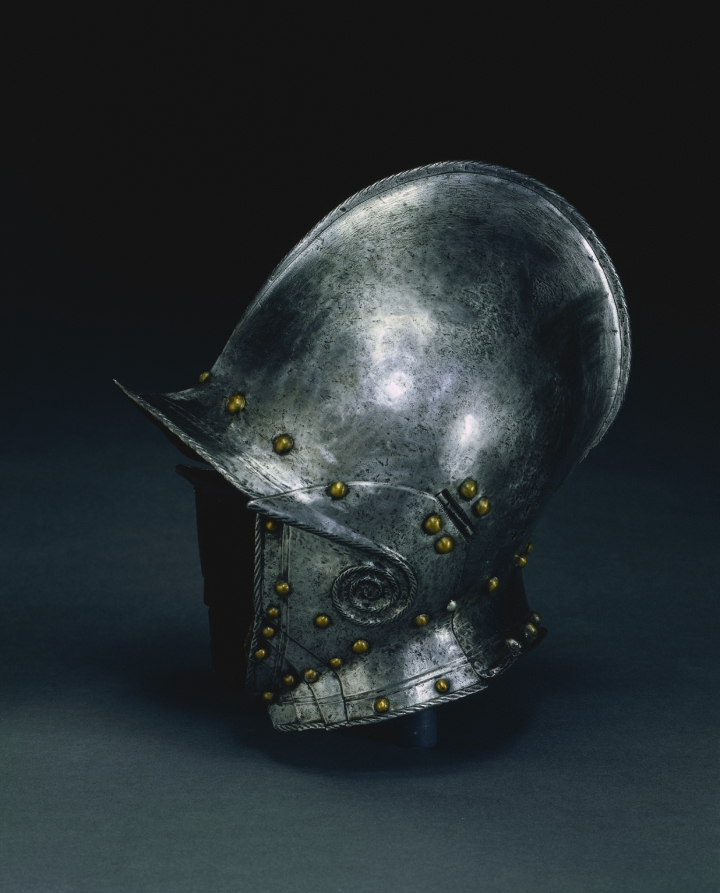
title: Burgonet with Hinged Cheek Pieces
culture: North Italy, 16th century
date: c. 1560–70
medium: steel with brass rivets, roped edges terminating in decorative spiral; fragments of leather liner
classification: Arms and Armor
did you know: This helmet once had a leather liner to protect a soldier's head from the hard steel. Armorers continuously innovated their designs, keeping in mind both protection and comfort.